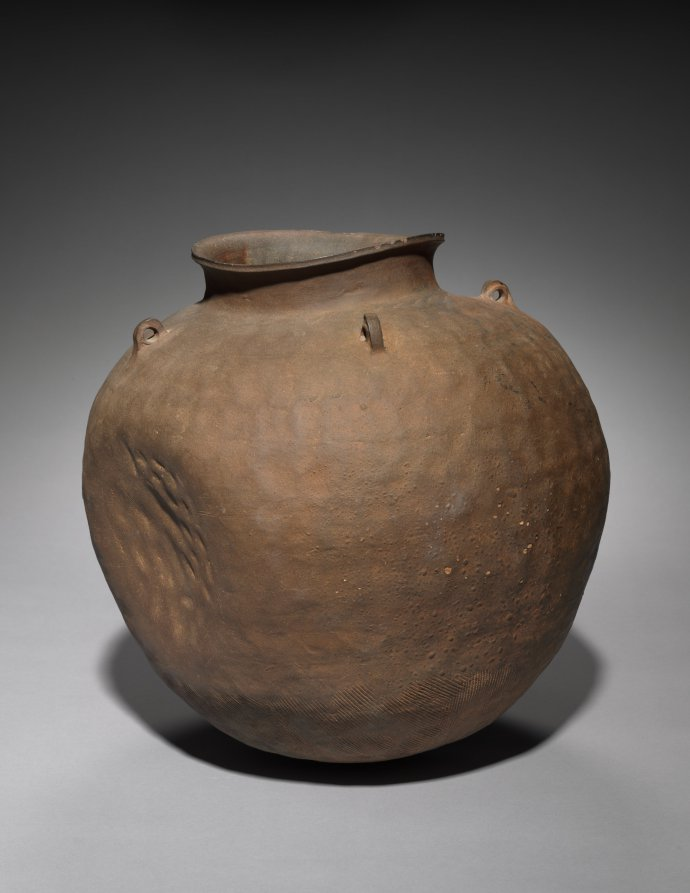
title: Short-necked Storage Jar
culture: Korea, Three Kingdoms period (57 BCE–668 CE)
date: 300s CE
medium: gray earthenware with impressed cord design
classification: Ceramic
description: Early earthenware from the Three Kingdoms period is characterized by the jar's gray hue. Closed kiln chambers built on hillsides, which fired clay as high as 2000°F, maintained a low level of oxygen saturation. The loops on its round shoulder suggest that the jar once had a lid fastened by cords. The function of this type of large jar remains unknown, yet it is highly possibly that it was used to store harvested grains and seeds. The pounding technique (tanal in Korean) used to treat the surface strengthened the clay body.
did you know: The surface of this pottery jar was treated by the pounding technique.